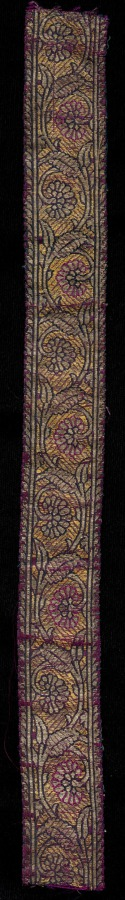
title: Narrow Strip used as Galloon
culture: India, 18th-19th century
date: 1700s - 1800s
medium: lampas weave with unbound brocaded pattern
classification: Textile